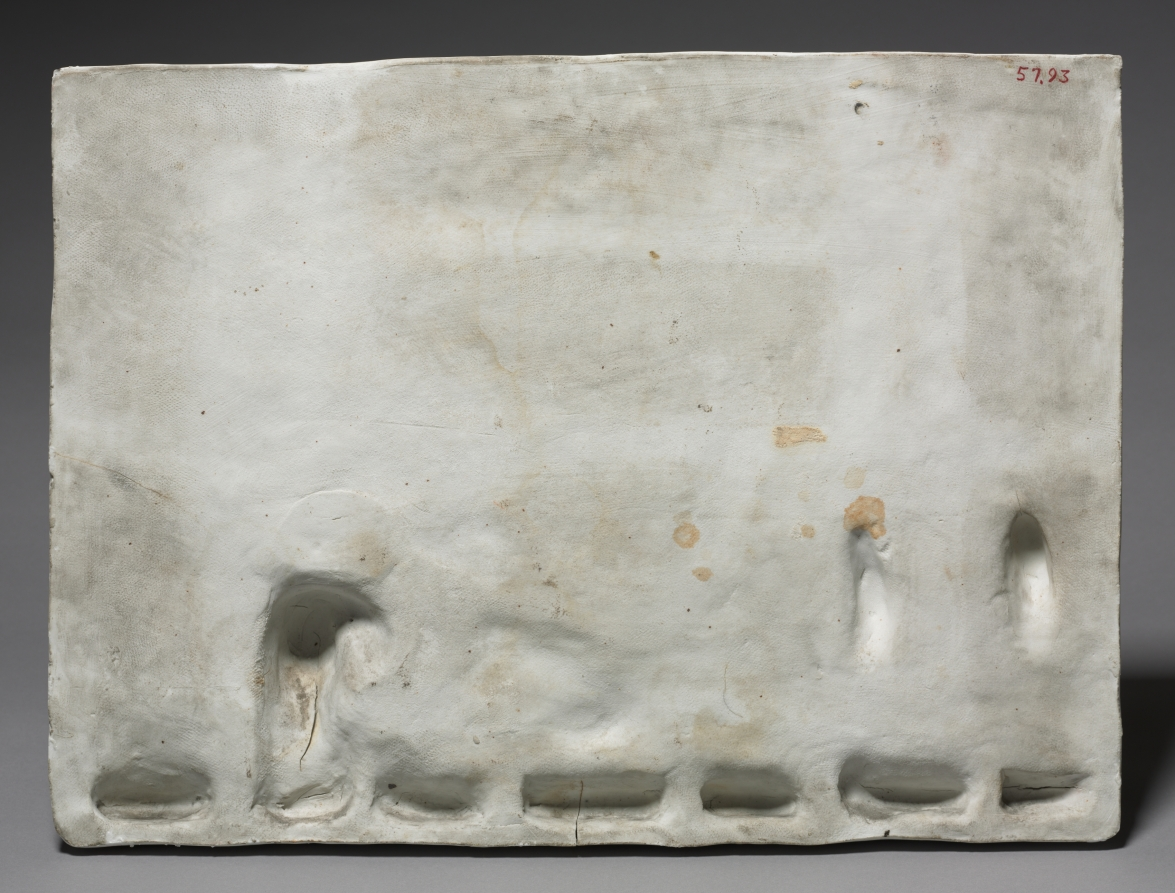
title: Spring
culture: Italy, near Florence, mid-18th century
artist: Doccia Porcelain Factory (Italian)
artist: after a design by Massimiliano Soldani (Italian, 1656–1740)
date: mid-1700s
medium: porcelain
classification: Sculpture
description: Although most 18th-century European porcelain factories produced three-dimensional works, these were often small figures intended to ornament dinner tables or mantelpieces. The factory at Doccia outside Florence was more ambitious, turning to baroque sculptors of the great local tradition to supply models for works in porcelain. In 1743 the factory purchased from the heirs of the famous Florentine sculptor Massimiliano Soldani (1656-1740) a number of that artist's models. Included were models for a series of reliefs representing the four seasons that were created by Soldani in 1708 for Ferdinando de' Medici. One of the reliefs was Spring, or The Realm of Flora, which was then executed in porcelain.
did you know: This relief representing spring includes many creatures: lions, a dog, and an eagle can all be spotted.